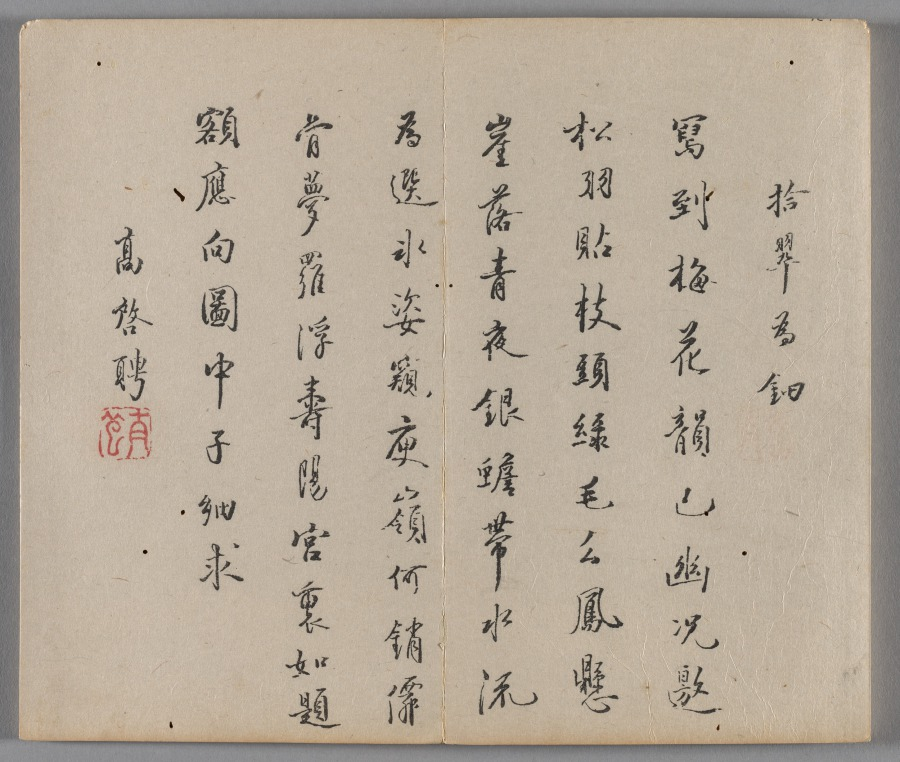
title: Ten Bamboo Studio Painting and Calligraphy Handbook (Shizhuzhai shuhua pu): Plum Blossoms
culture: China, Qing dynasty (1644-1911)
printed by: Hu Zhengyan (Chinese, c. 1584–1674)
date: 1633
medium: Woodblock-printed book; ink and colors on paper; first edition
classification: Print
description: Color printing reached a level of perfection in the early 1600s, as seen in this Ten Bamboo Studio Collection of Calligraphy and Painting and the Mustard Seed Garden Manual of Painting (printed 1679 and 1701). The painterly quality, precision in registering (aligning) the woodblocks, and harmonious colors made them the most successful color print editions in Chinese history. Both editions were printed and compiled in Nanjing, spread nationwide, and had a great impact on the arts in Japan and Korea.